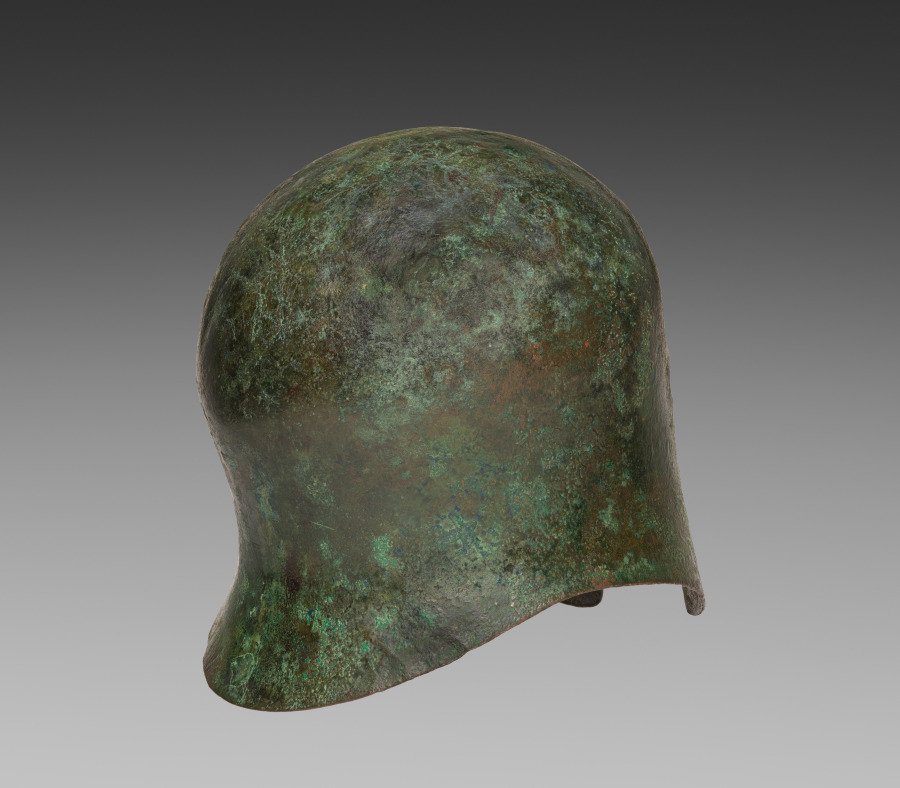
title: Corinthian Helmet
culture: Greek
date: c. 625–550 BCE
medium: Bronze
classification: Arms and Armor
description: This remarkably well-preserved bronze helmet belongs to an iconic type known as Corinthian yet produced far beyond the city of Corinth. Designed for use by hoplite warriors, who fought with spears and shields in shoulder-to-shoulder (phalanx) formation, such helmets provide maximum protection but limited vision, hearing, and movement. Probably first cast and then hammered into its final shape, the helmet features both gentle curves and sharp angles, evoking the head and face that it protected. Similar helmets appear frequently on warriors shown in ancient art, though often with crests of horsehair or other organic materials that no longer survive.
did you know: A small hole above the rear neckline, now repaired, may reflect a fatal blow.